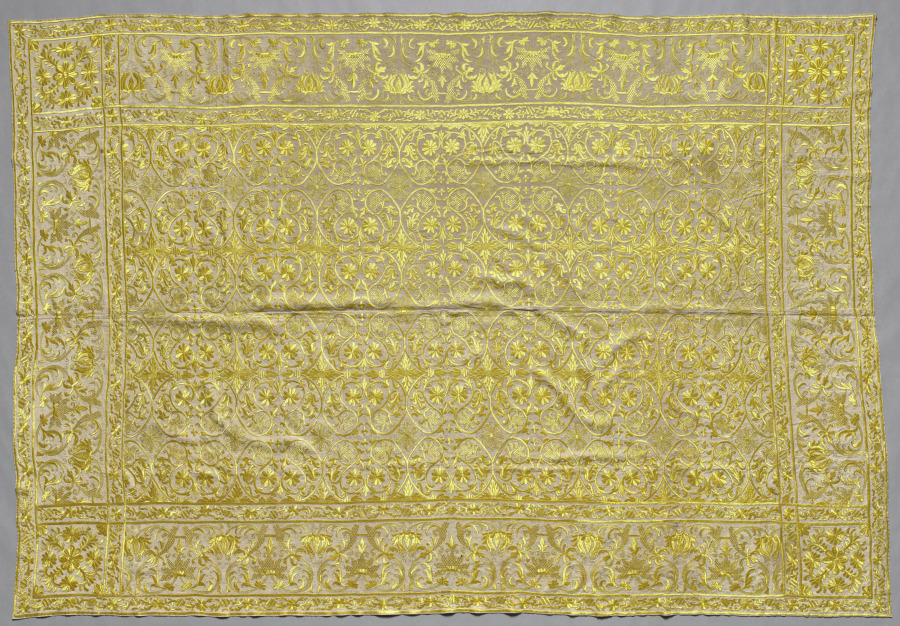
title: Embroidered Bedspread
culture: Portugal, 18th century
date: 18th century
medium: embroidery; silk on linen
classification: Embroidery